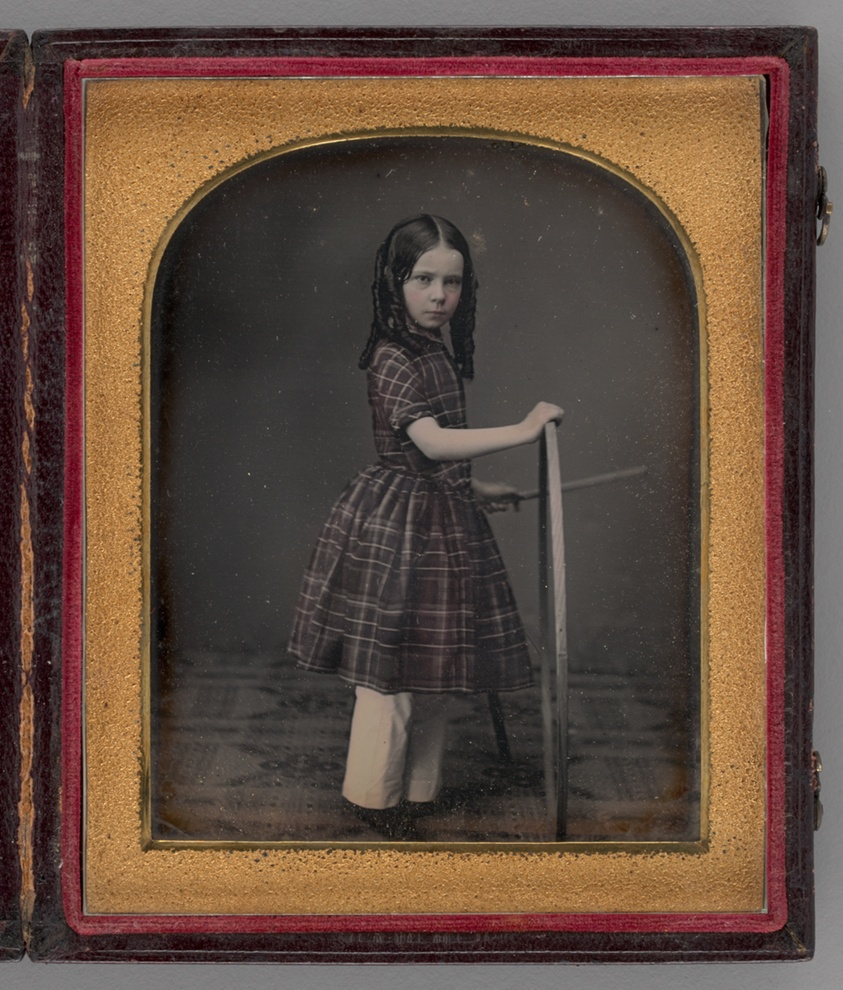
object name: Photograph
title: Untitled (Portrait of Girl Holding Stick and Hoop)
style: 19th century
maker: Unknown maker; American, 19th century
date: 1846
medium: Daguerreotype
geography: United States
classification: portrait; photograph; photographic process; photography; portrait; daguerreotype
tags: lundberg collection, portrait, girls, female, portraits, portraits: child subject, portraits: female subject